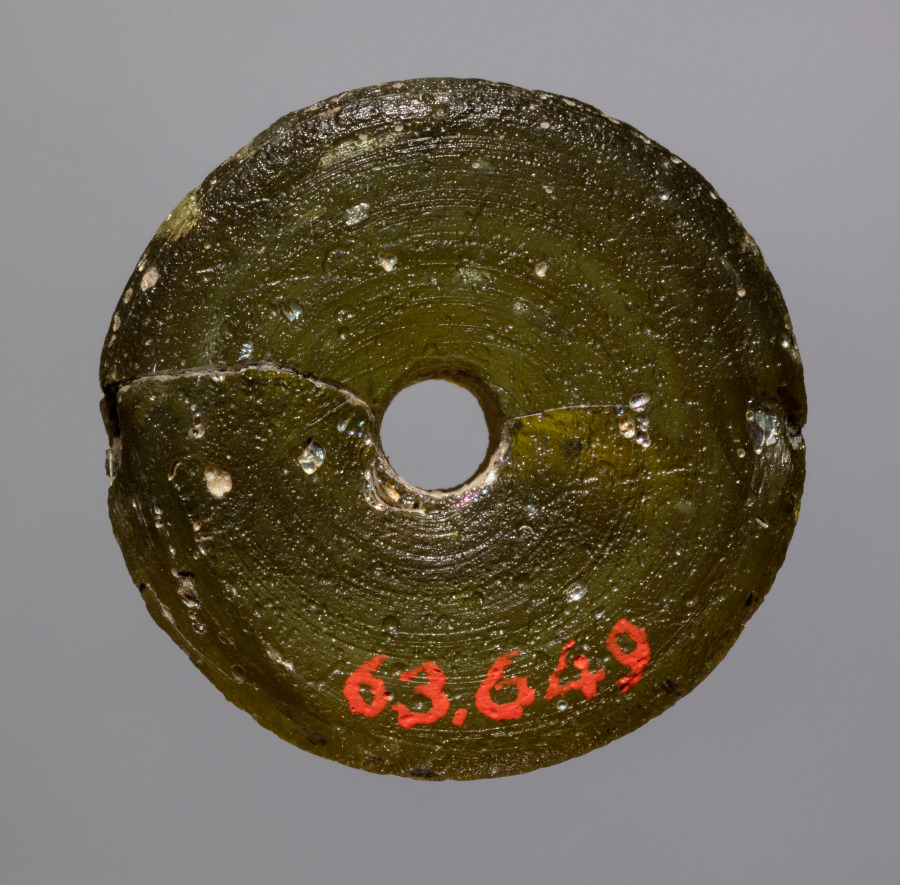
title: Spindle Whorl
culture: Iran, early Islamic period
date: 700s - 900s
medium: glass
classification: Spindle Whorl